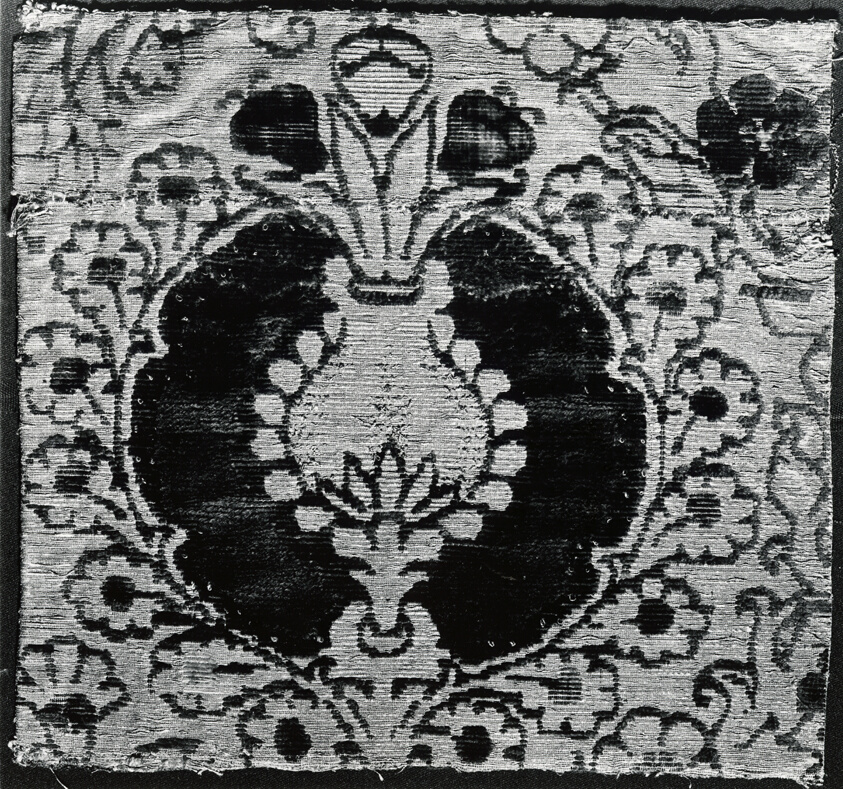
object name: Textile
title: Fragment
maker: Italy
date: 1450/1500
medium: Silk and cotton, velvet; cut pile-on-pile, voided; additional paired patterning wefts in gold foil (cut strips wound around silk core) tied in twill weave; against plain weave foundation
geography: Italy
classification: textile; weaving - velvet